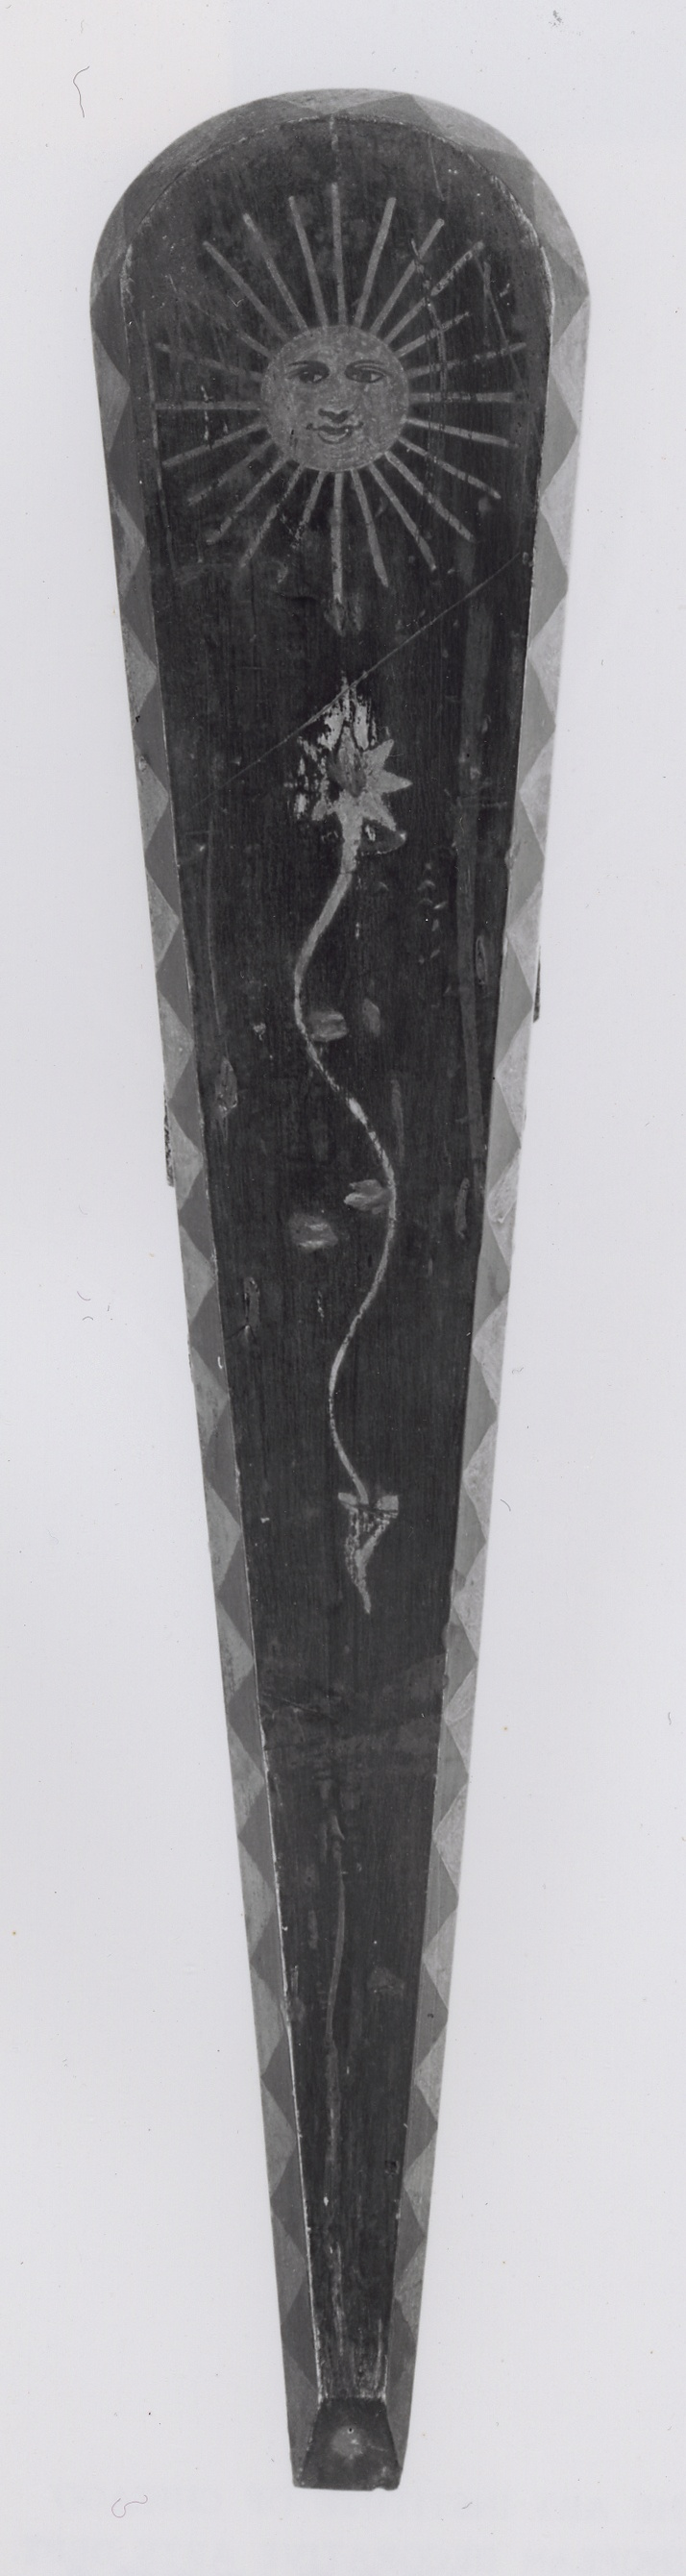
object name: Armor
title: Shield (Targone) for the Gioco del Ponte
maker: Italian; Pisa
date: 1776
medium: Wood, iron, and paint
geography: Pisa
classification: shield; armor; arms and armor